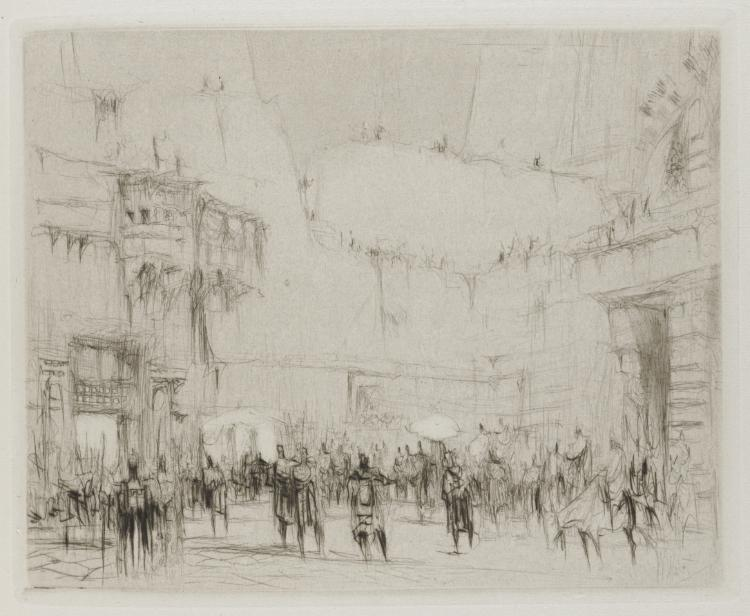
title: Herodias: Page 19, The ramparts were thronged with people when Vitellius entered the castle gates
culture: England, 20th century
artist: William Walcot (British, 1874–1943)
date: 1928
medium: etching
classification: Print